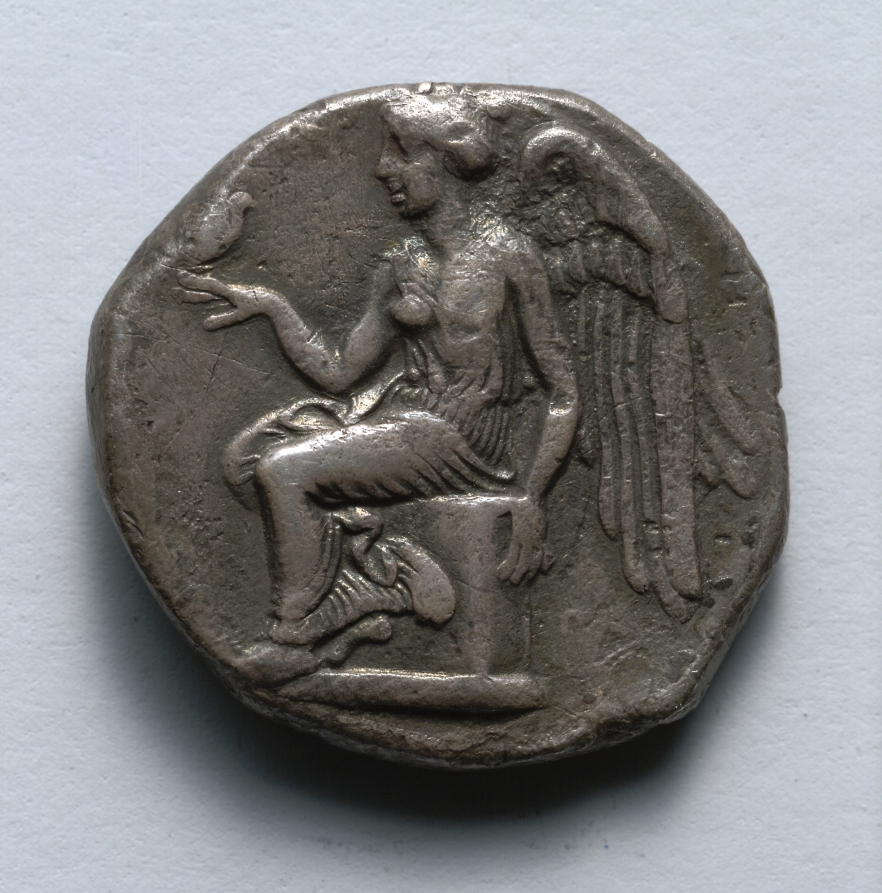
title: Stater: Nike (Reverse)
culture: Greek, minted at Terina (South Italy)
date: c. 420–400 BCE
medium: silver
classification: Coins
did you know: Nike sits on a cippus, a pillar used as a boundary stone or grave marker.